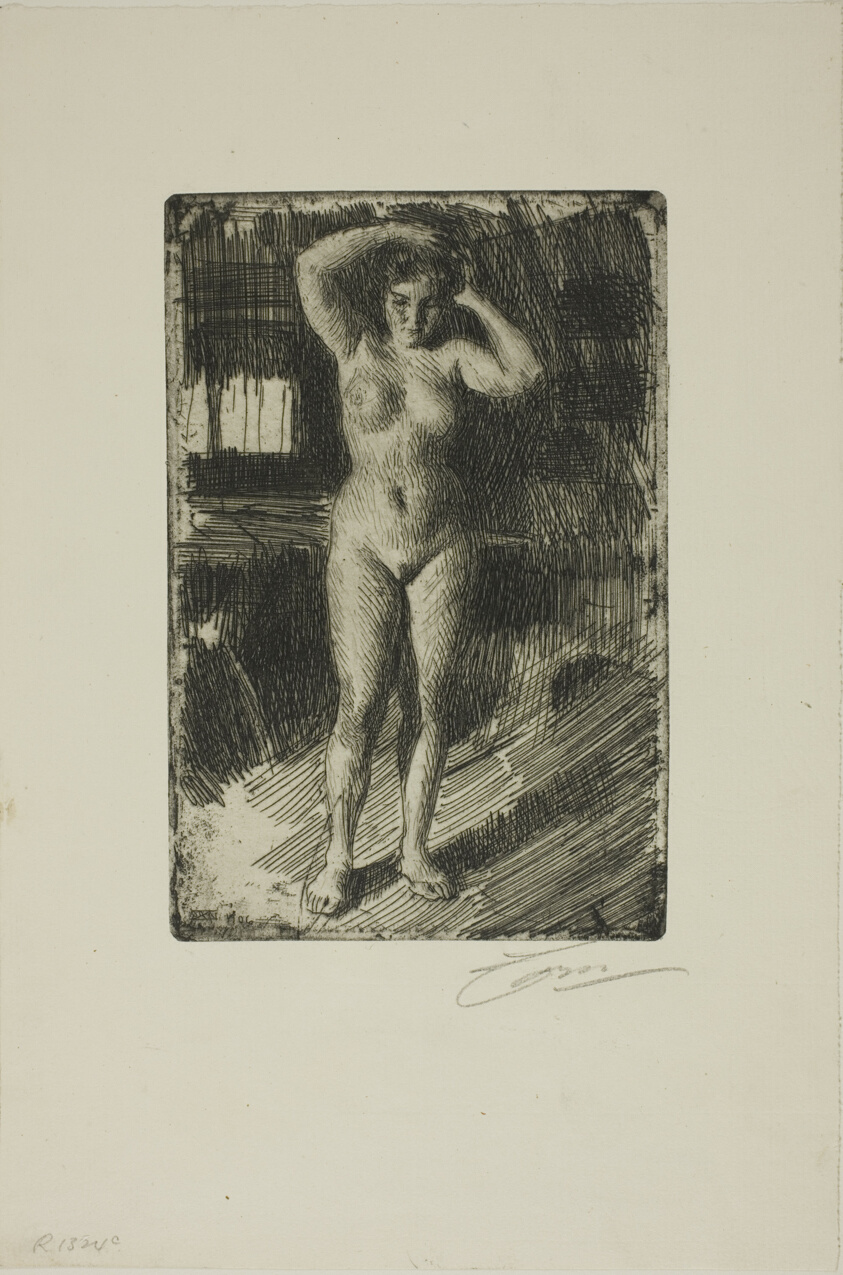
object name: Print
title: Anna Doing Her Hair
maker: Anders Zorn (Swedish, 1860-1920)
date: 1906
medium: Etching on ivory laid paper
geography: Sweden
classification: etching; print; prints and drawing